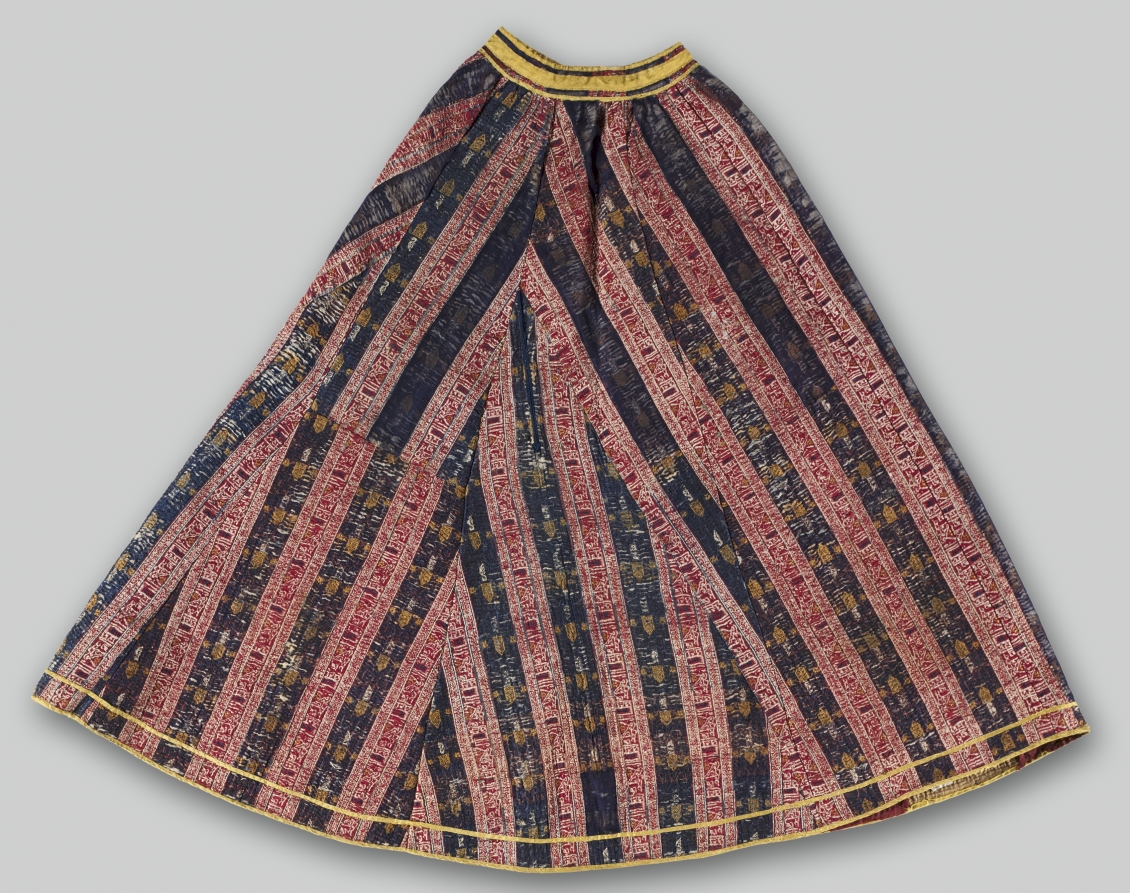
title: Mantle for a statue of the Virgin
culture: Spain, Granada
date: late 1400s–1500s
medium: Silk: lampas weave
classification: Textile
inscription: on red ground is Naskhi inscription "Glory to our Lord, the Sultan" in white.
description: A striped silk textile, probably made for use in the Islamic Alhambra palatine complex, was turned into a mantle for a statue of the Virgin Mary. On the crimson stripes the salutation that occurs as ornamental text throughout the Alhambra, Glory to our Lord the Sultan, repeats in Arabic script.